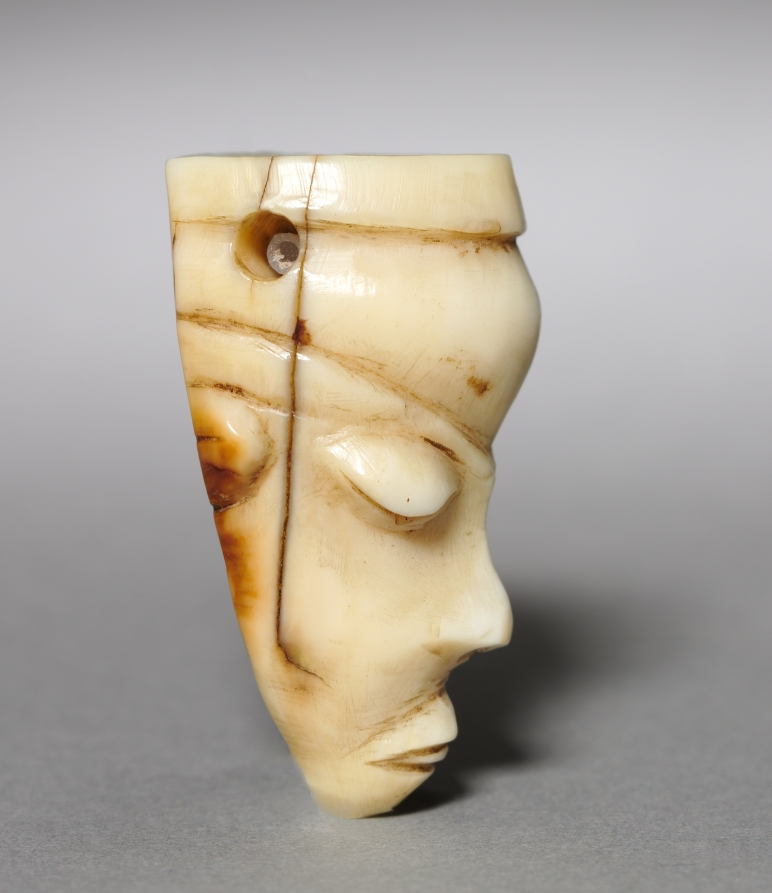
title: Pendant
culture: Central Africa, Democratic Republic of the Congo, Pende, 19th century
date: late 1800s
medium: ivory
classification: Jewelry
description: Pendants like these were worn as symbols of protection.